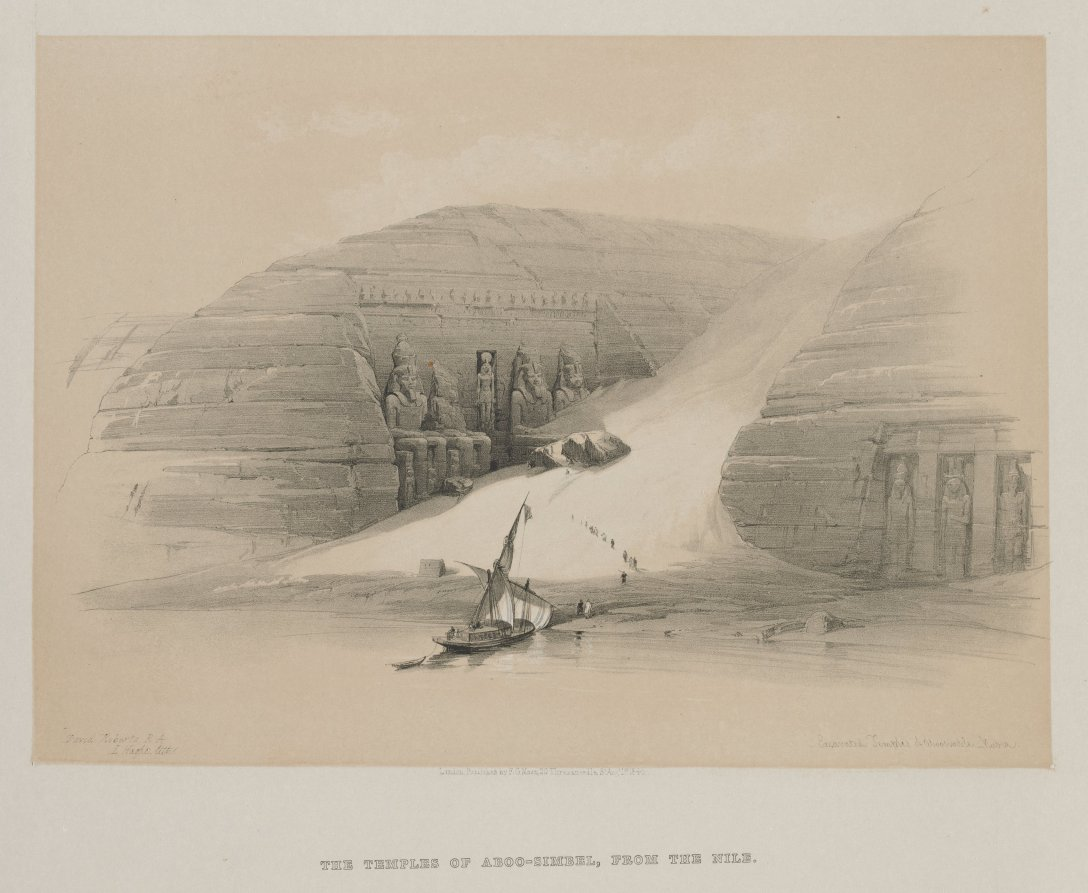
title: Egypt and Nubia, Volume II: Excavated Temples of Abo Simble, Nubia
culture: England, 19th century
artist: Louis Haghe (British, 1806–1885)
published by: F. G. Moon, 20 Threadneedle Street, London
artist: after David Roberts (Scottish, 1796–1864)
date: 1848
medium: color lithograph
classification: Print